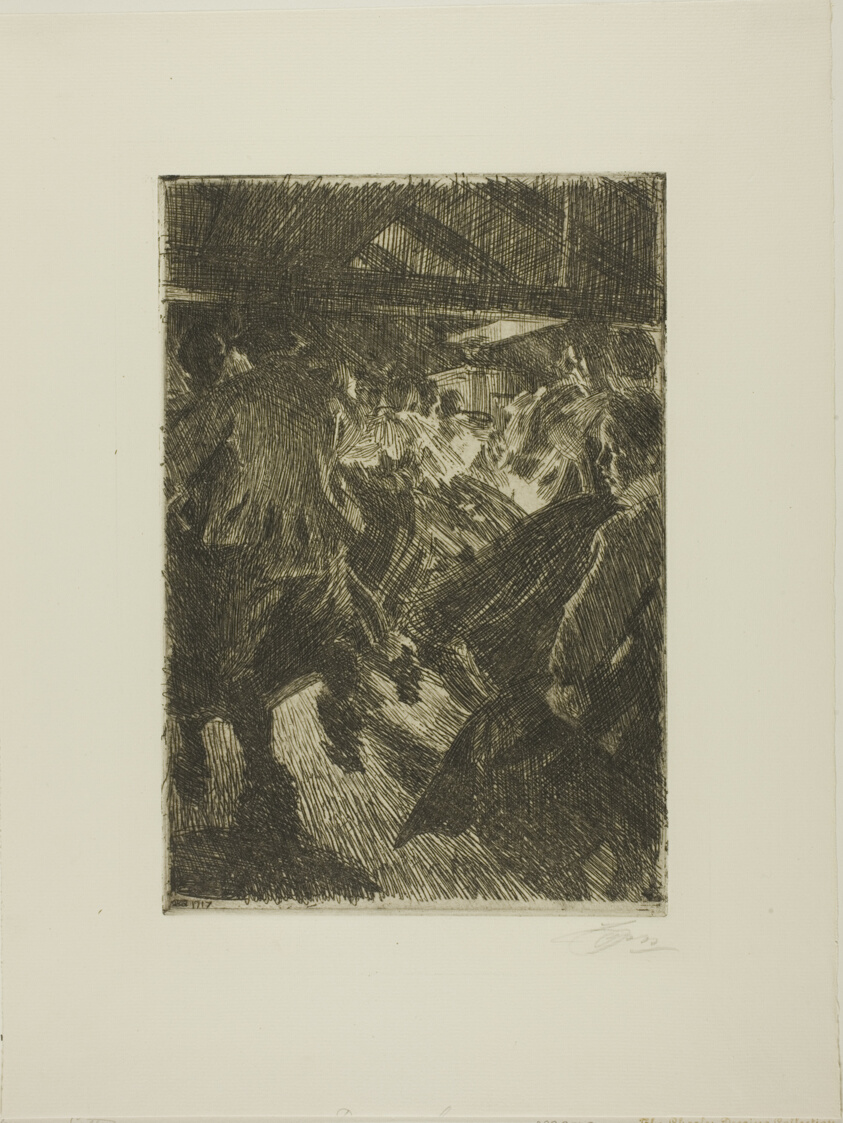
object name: Print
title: Gopsmor Cottage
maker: Anders Zorn (Swedish, 1860-1920)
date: 1917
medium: Etching on ivory laid paper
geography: Sweden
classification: etching; print; prints and drawing